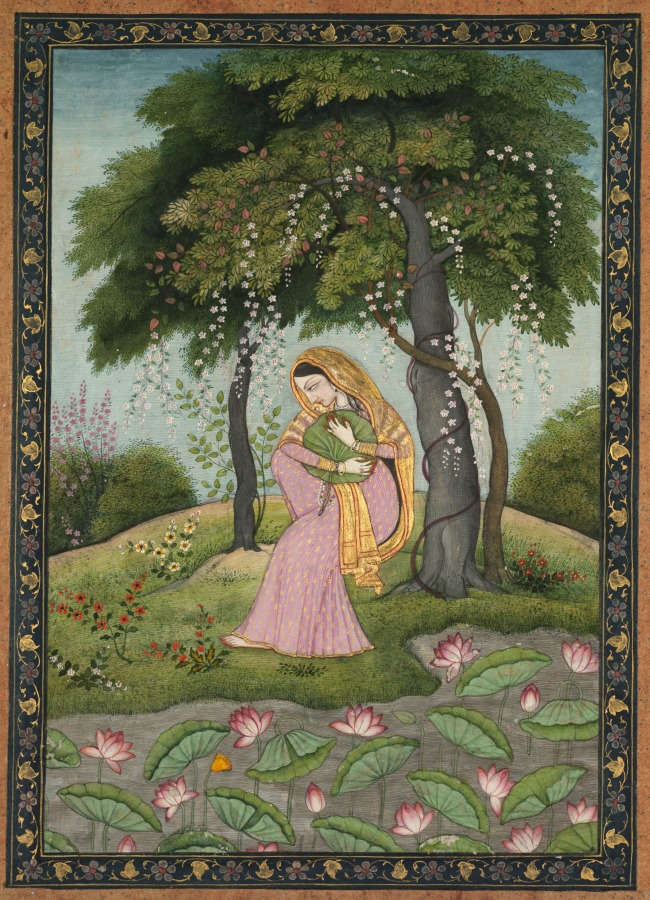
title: Virahini Nayika, Love-Torn Heroine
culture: India, Pahari Hills, Kangra school, late 18th-early 19th Century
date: c. 1800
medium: Gum tempera, ink, and gold on paper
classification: Painting